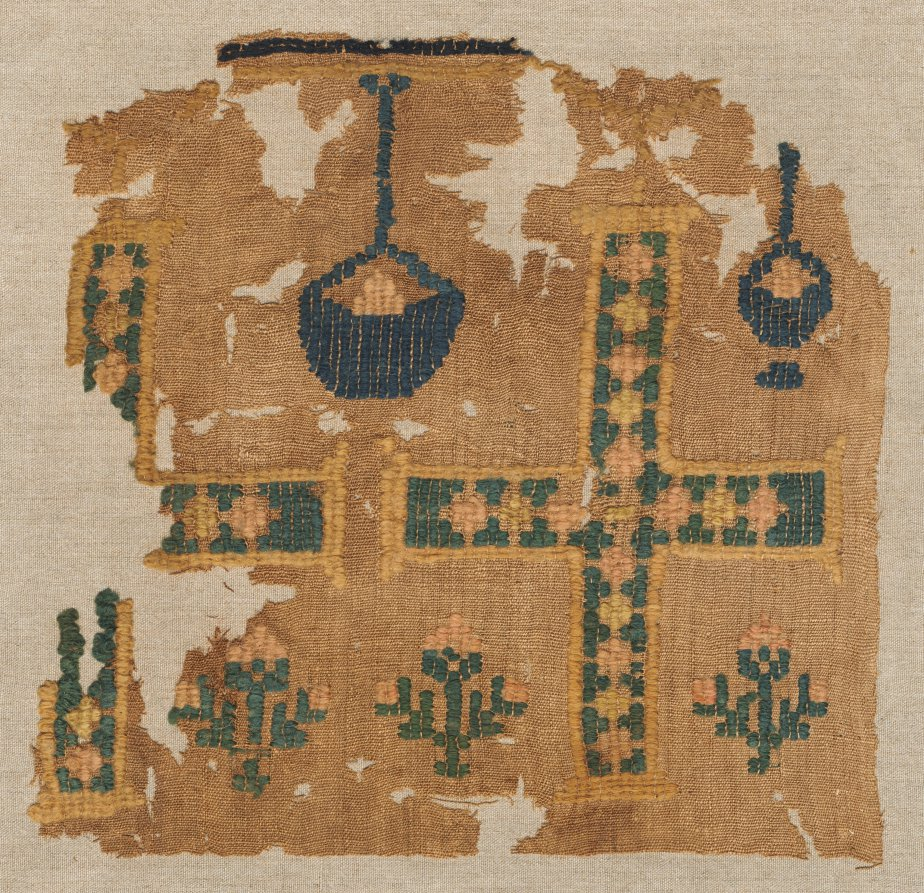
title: Fragment of a Large Hanging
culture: Egypt, Byzantine period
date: 500s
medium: brocaded tabby; linen and wool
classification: Textile